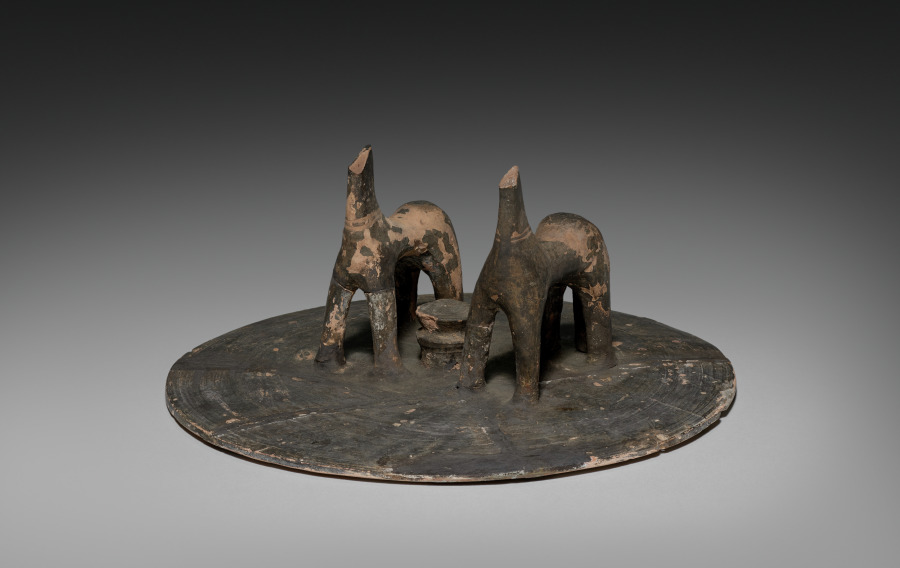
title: Geometric Horse Pyxis (Cylindrical Lid)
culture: Greek, Attic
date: c. 760–750 BCE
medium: ceramic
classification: Ceramic